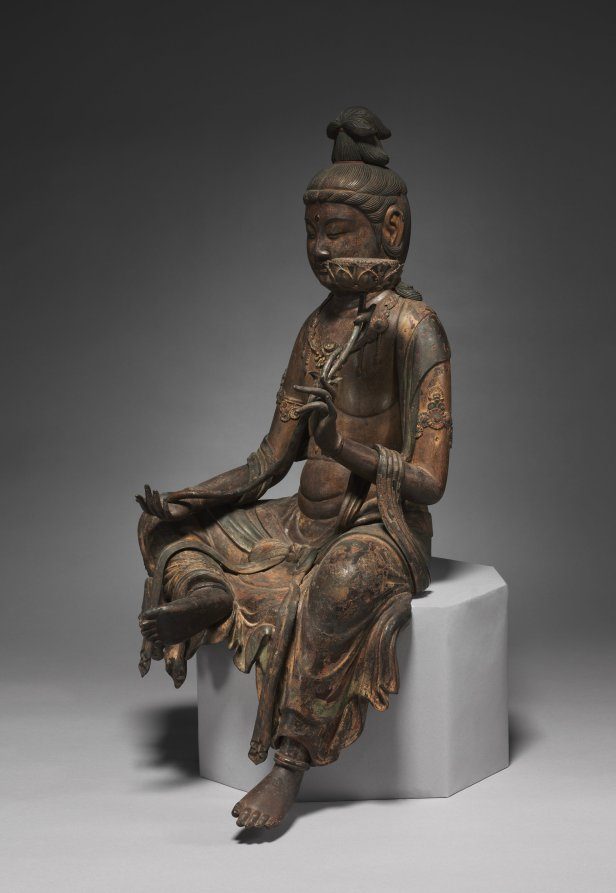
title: Bodhisattva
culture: Japan, Kamakura period (1185–1333)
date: mid-1200s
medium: wood with traces of lacquer, polychromy, and cut gold lear (kirikane)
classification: Sculpture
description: A Bosatsu (Bodhisattva in Sanskrit) is a being that has attained enlightenment but has compassionately refrained from entering nirvana in order to save others. As an attendant of Buddha, Bosatsu assumes many forms, all of which are worshipped as deities in Japanese Buddhism.